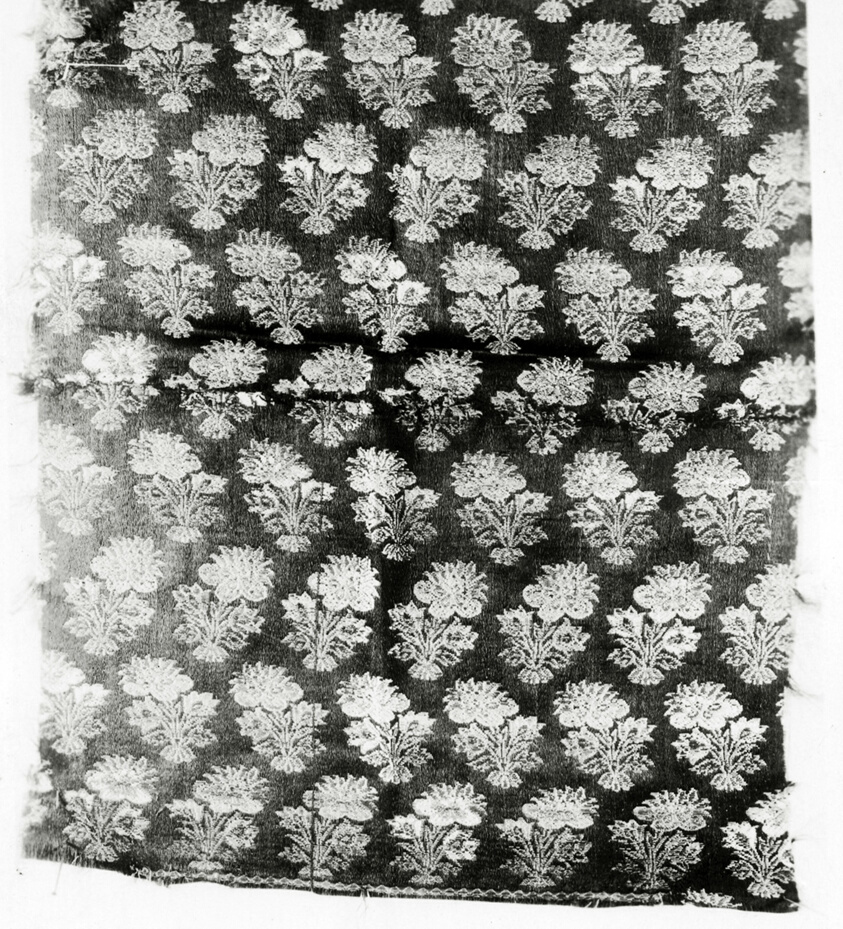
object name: Textile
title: Fragment (Dress Fabric)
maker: Iran (Kashan)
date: 18th century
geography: Iran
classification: textile; weaving